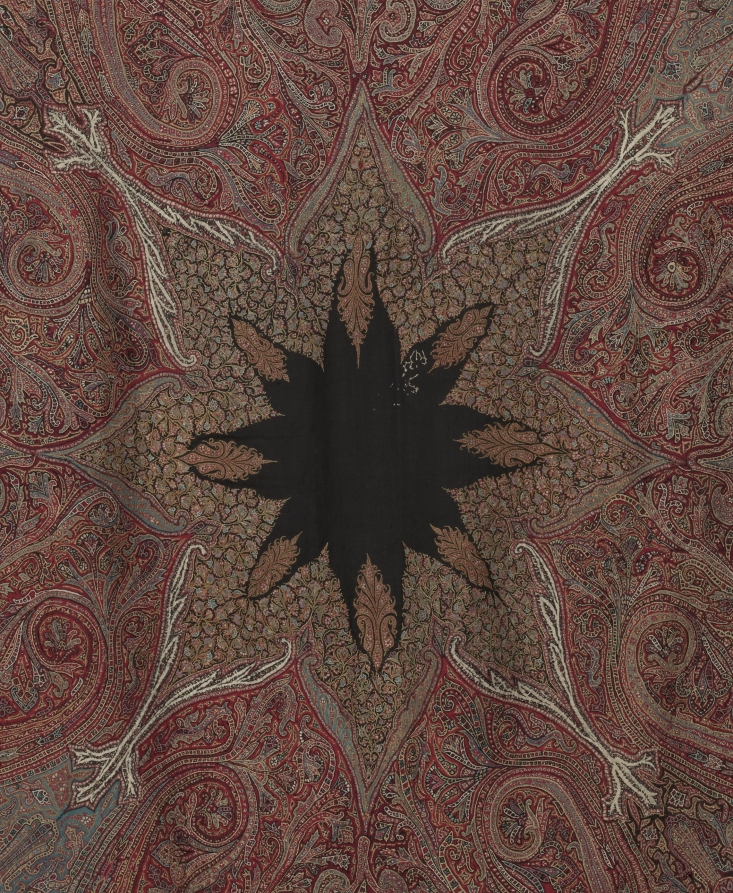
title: Square Pieced Shawl with Vase Corners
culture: India, Kashmir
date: 1867–75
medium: wool; 2/2 twill tapestry (S), double interlocked, pieced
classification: Textile